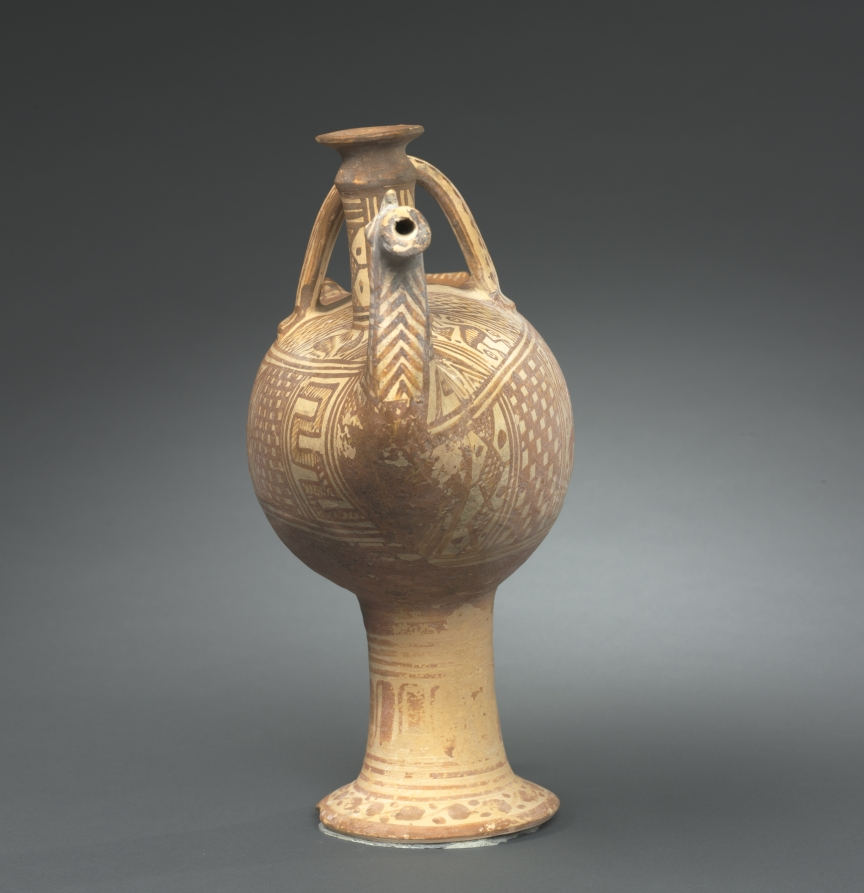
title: Italo-Geometric Bird Askos (Oil Vessel): Hunter (Herakles?) and Stag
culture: Etruscan, likely made at Vulci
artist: attributed to Bisenzio Class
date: c. 700 BCE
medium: ceramic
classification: Ceramic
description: This bird-shaped askos (oil vessel), with a tall filling spout and a pierced beak for pouring, perhaps held perfumed oil for a funerary function. Although the shape likely stems from Italian tradition, the abundantly painted geometric decoration, covering nearly every available surface, derives originally from Greece. Thus scholars have suggested that an immigrant Greek potter working in Etruria may have made the vessel. The sole narrative scene shows a man with a spear leading an antlered animal. If not an anonymous hunter, this could be the earliest known representation of the hero Herakles performing his third labor: capturing the golden-antlered Keryneian hind, or female deer.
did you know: This askos may feature the earliest known representation of Herakles's third labor, the Keryneian hind.